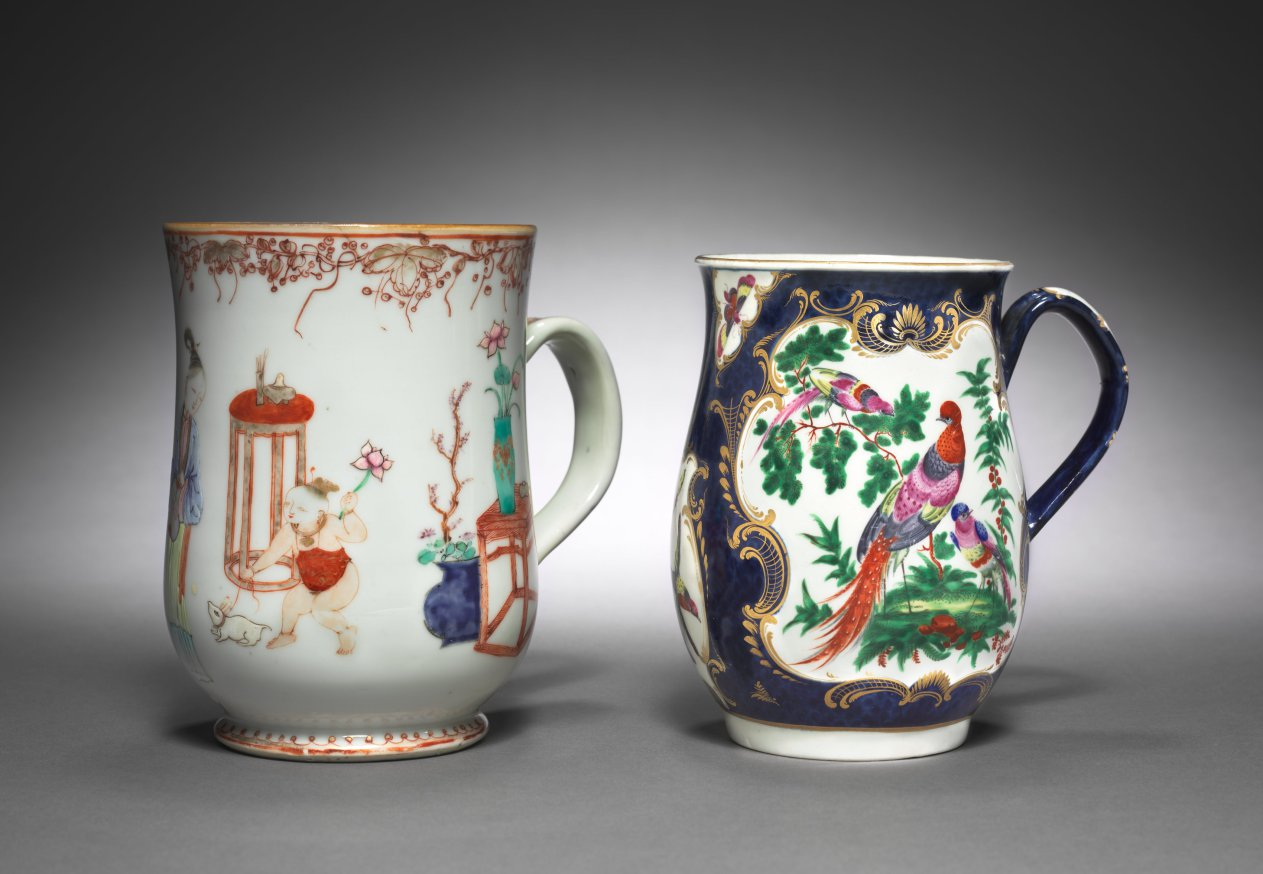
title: Tankard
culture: England, 18th century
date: 1765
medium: ceramic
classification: Ceramic